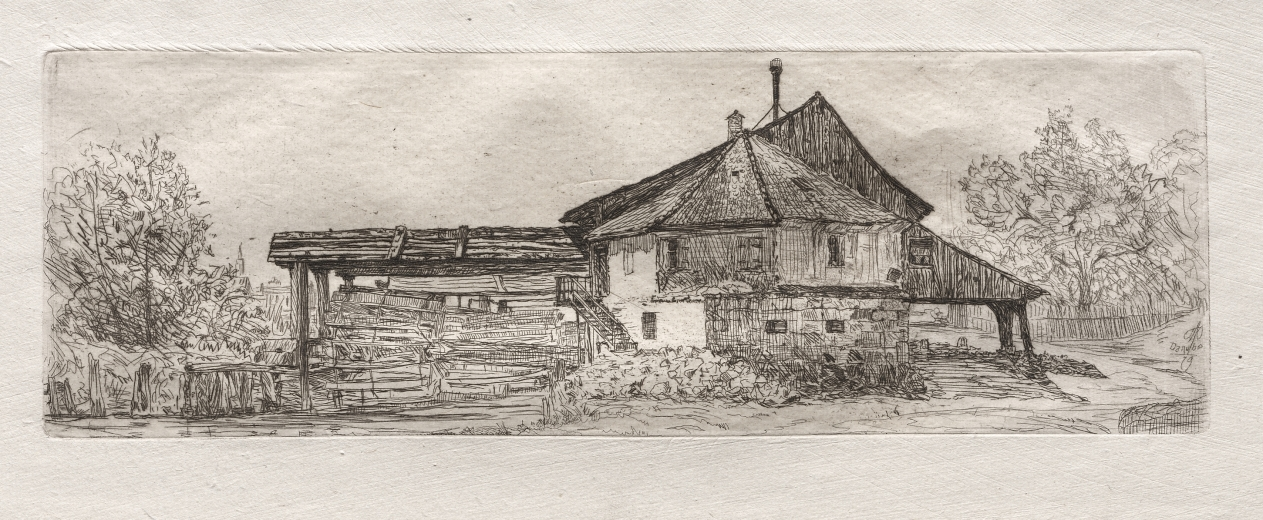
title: Old Mill on the Danube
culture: America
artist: Otto H. Bacher (American, 1856–1909)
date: 1879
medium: etching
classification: Print